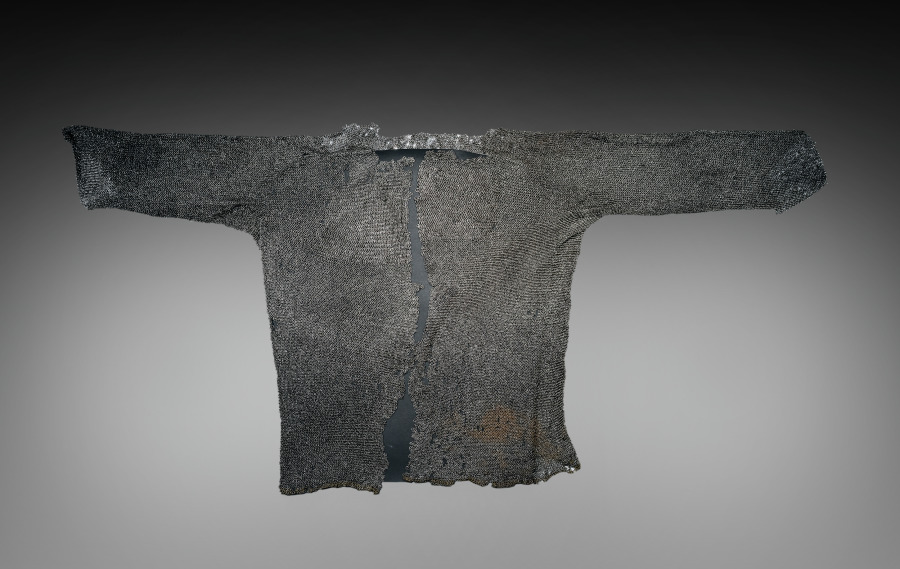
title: Hauberk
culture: Europe, 15th century; India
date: 1400s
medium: very fine rings; border of brass rings at bottom edge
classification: Arms and Armor